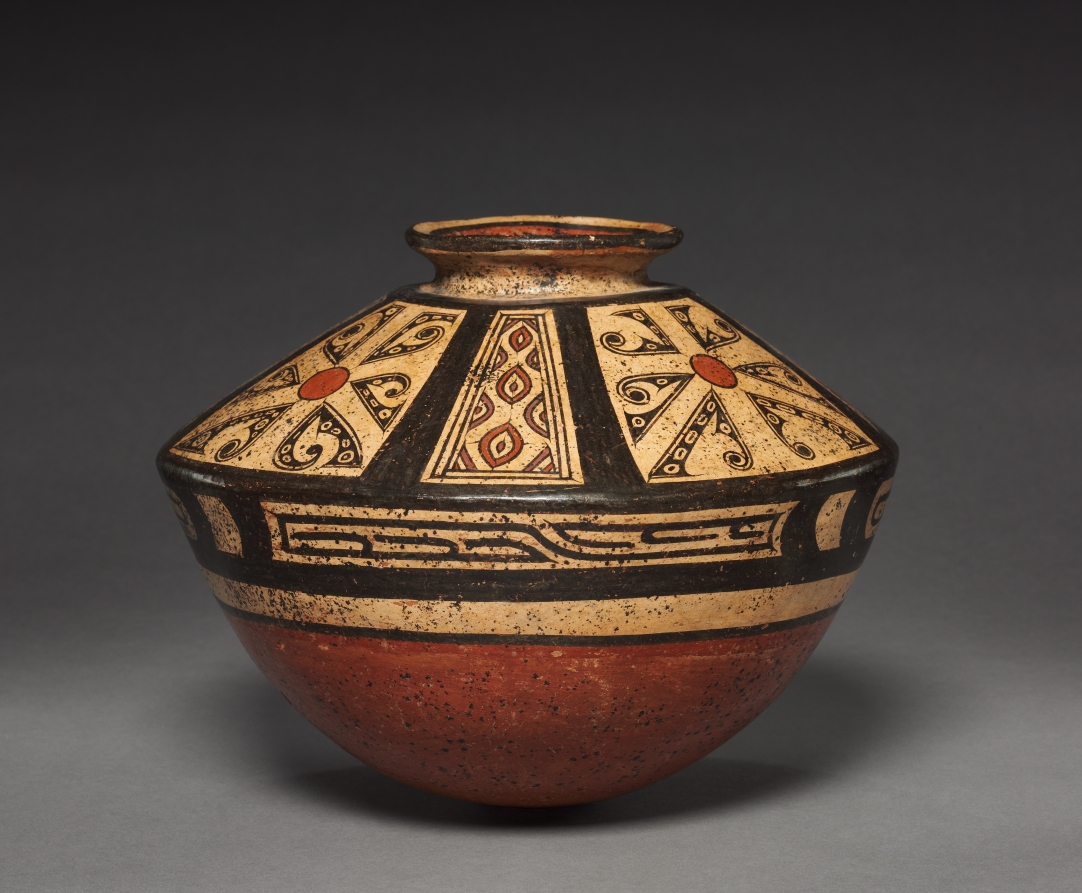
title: Vessel: Turtle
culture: Panama, Parita style, 11th-14th century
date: 1000–1300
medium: ceramic, slip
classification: Ceramic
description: Many Panamanian ceramics are among the most handsome and deftly designed in the Americas. Note how cleverly the artist used the vessel shape to imitate a turtle's carapace, its head peering out from its shell, its feet painted on the back (no. 10). And the stingray floats atop its pedestal, as though gliding through water (no. 9). Lamentably, little is known about the meaning of these witty ceramics.